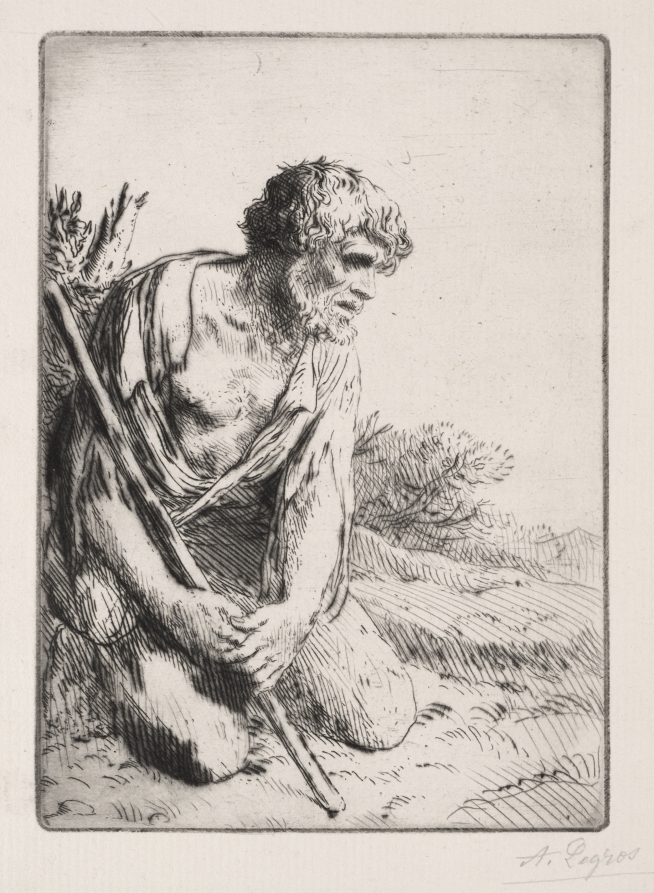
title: The Prodigal Son (3rd Plate)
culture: France, 19th century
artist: Alphonse Legros (French, 1837–1911)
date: c. 1857–1911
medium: drypoint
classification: Print